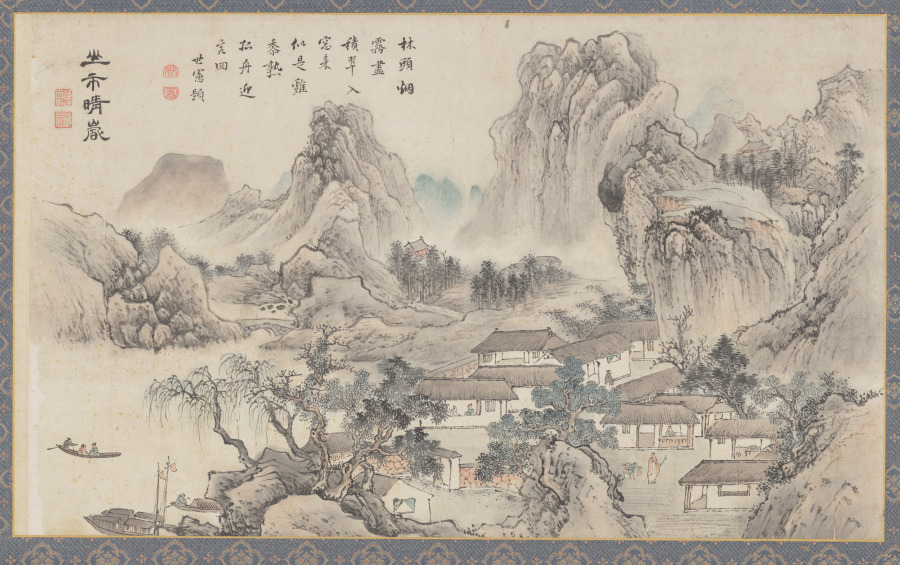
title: Mountain Market in Clearing Mist, from Eight Views of Xiao-Xiang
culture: Japan, Edo period (1615–1868)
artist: Tani Bunchō (Japanese, 1763–1841)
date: 1788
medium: album leaf remounted as a hanging scroll; ink and color on paper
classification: Painting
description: This painting was part of a set of album leaves representing the Eight Views of Xiao-Xiang, a theme originating in Chinese poetry and painting that spread to both Korea and Japan. Southern China’s Xiao-Xiang area, where the mist-covered banks of the Xiang River created a complex landscape shifting like the moods and minds of people, captured the imaginations of generations of painters and calligraphers. Inscriptions on these works suggest that they were possibly ordered by newly prominent Japanese Confucian scholars.